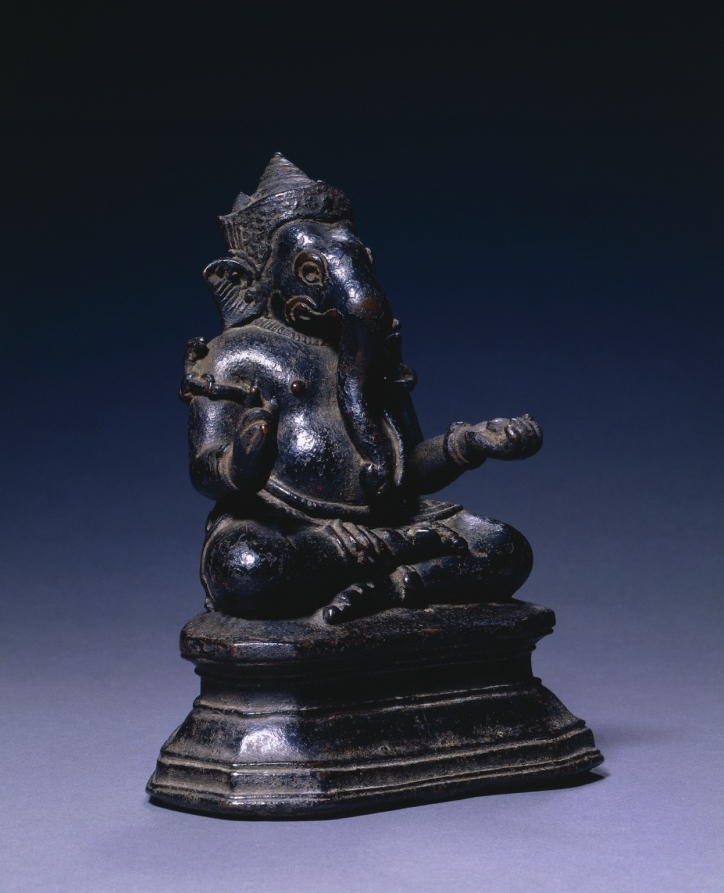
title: Seated Two-armed Ganesa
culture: Cambodia, Angkor Wat Period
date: late 1100s-early 1200s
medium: bronze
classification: Sculpture